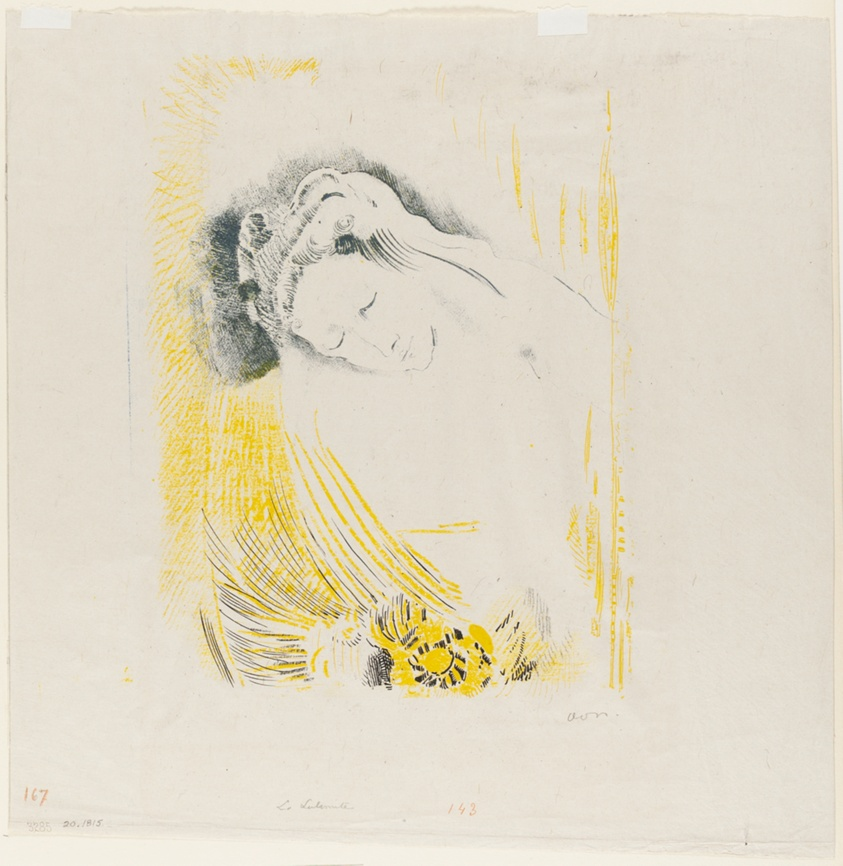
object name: Print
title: The Shulamite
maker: Odilon Redon (French, 1840-1916)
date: 1897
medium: Lithograph printed in black and yellow on heavy cream chine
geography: France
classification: lithograph; print; prints and drawing; paper